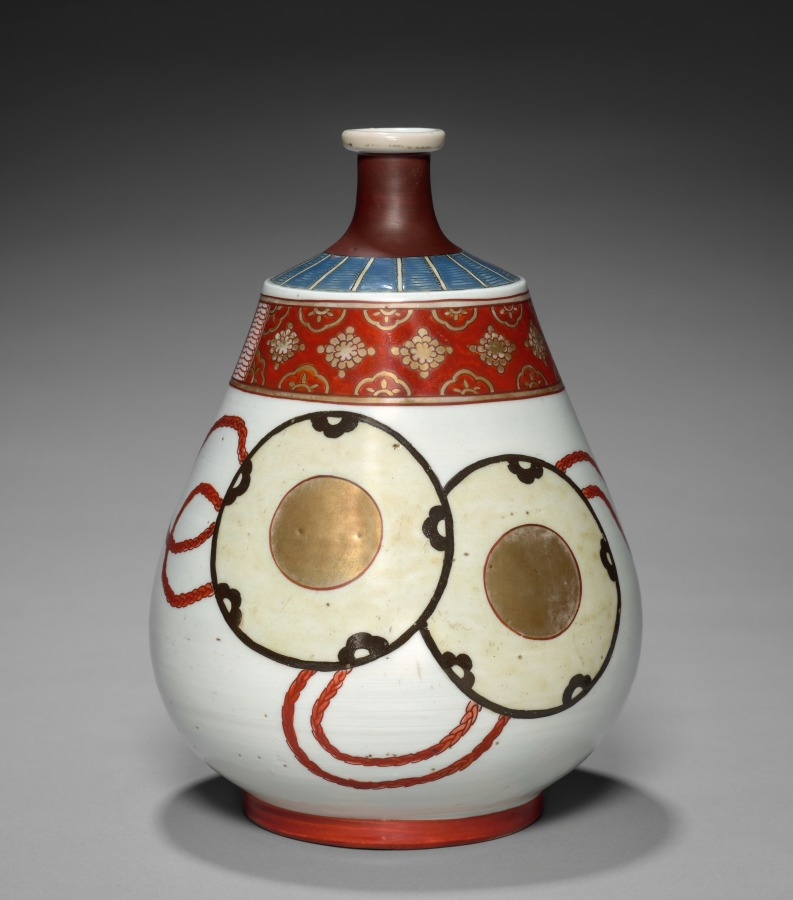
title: Bottle-Flask with Drums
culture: Japan, Edo period (1615–1868)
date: 1700s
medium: porcelain with overglaze color enamel (Hizen ware, Arita type, Imari style)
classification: Ceramic